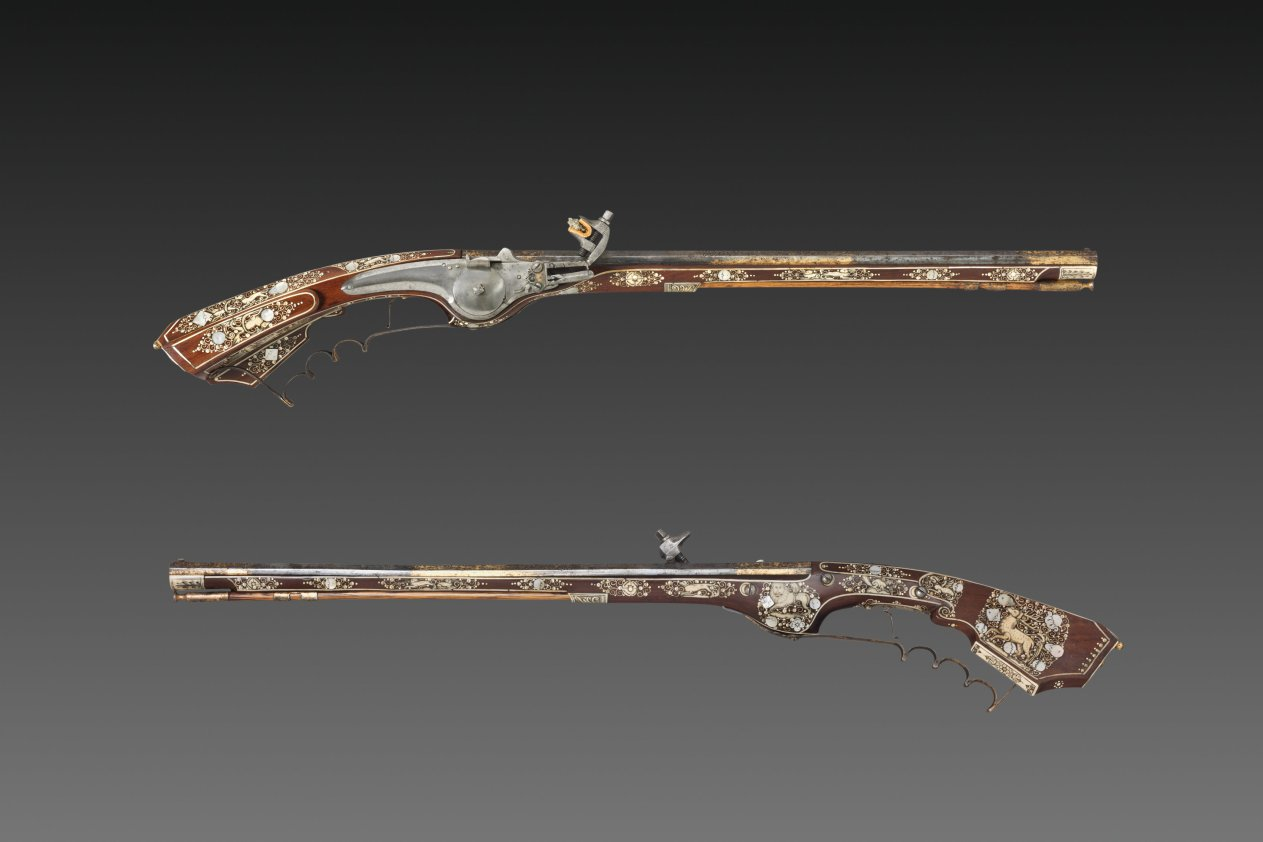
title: Pair of Wheel-lock Petronels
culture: Silesia (Southwestern Poland), Teschen, 17th century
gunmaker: Georg Kurland (Polish)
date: c. 1630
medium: steel, gilding, and wood inlaid with elk horn, ivory, and mother-of-pearl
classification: Arms and Armor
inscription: Georg Kurland (signed)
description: A petronel was a type of long pistol made with a wheel-lock ignition. Despite its length, the petronel was fired at the wrist like a pistol and not at the shoulder like a rifle. They were generally made in pairs during the early 1600s. Civilian versions were elaborately decorated for aristocratic clients.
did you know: These luxury objects were used by wealthy men as sporting weapons.